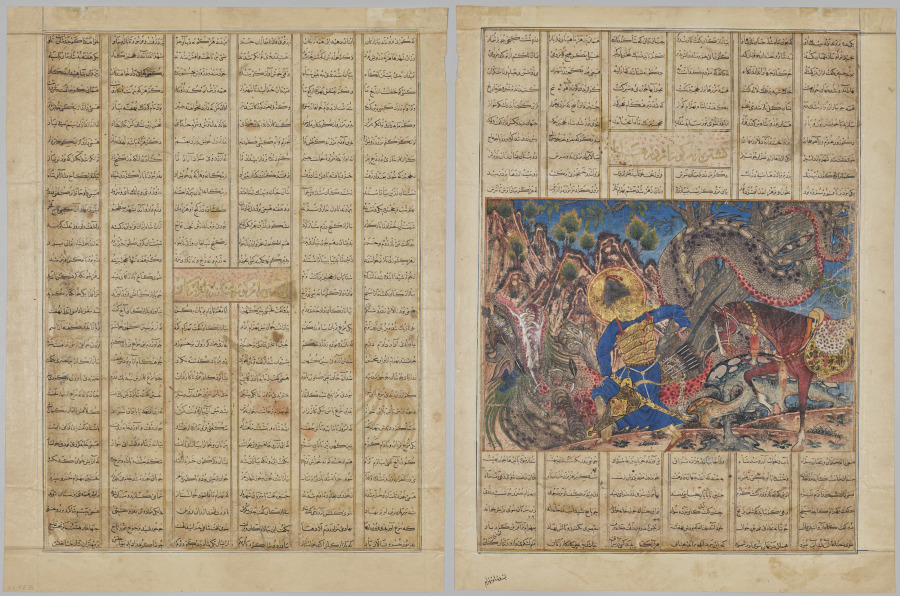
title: Bahram Gur Arrives at the House of a Merchant, text page (recto); Bahram Gur Slays a Dragon (verso), from a Shahnama (Book of Kings) of Firdausi (940–1019 or 1025), known as the Great Mongol Shahnama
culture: Iran, Tabriz, Ilkhanid period (1256-1353)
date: 1330–35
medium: opaque watercolor, ink, and gold on paper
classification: Manuscript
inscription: Script: Naskh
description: In this intense painting, Bahram Gur plunges his sword into the breast of a dragon. A favorite character from Iran's pre-Islamic history, Bahram Gur (reigned 420–38 CE) was a popular ruler of the Sasanian dynasty and a great hunter. He took the name "Gur," meaning onager (a wild ass), because it was his preferred game, although he also excelled at killing dragons. As evidenced by this illustration's rock formations, tree trunk, and dragon, Iranian painting in the Mongol period borrowed numerous stylistic and spatial elements from Chinese models. With the surging landscape and writhing dragon rendered with equal energy, this is a picture of extraordinary unity and concentration.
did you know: The Shahnama is an epic poem that traces the fortunes of heroes and kings, of lovers and enemies.